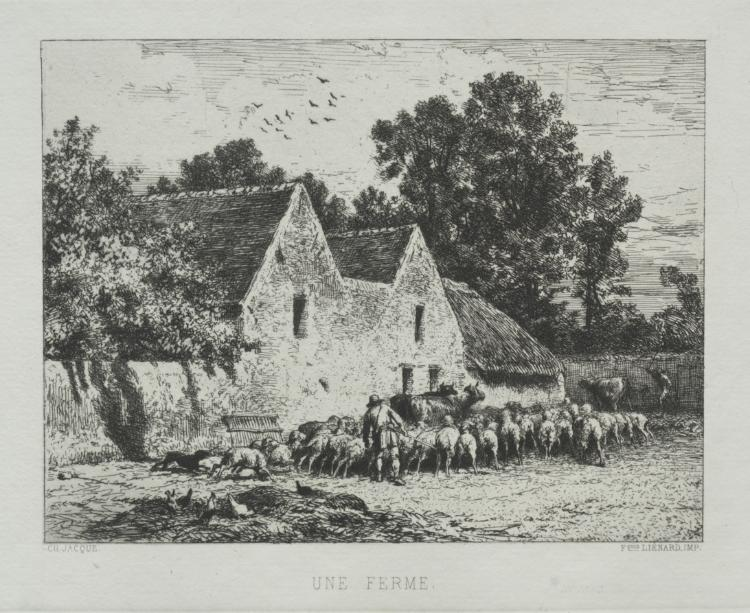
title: A Farmhouse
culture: France, 19th century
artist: Charles-Émile Jacque (French, 1813–1894)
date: 1864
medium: etching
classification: Print